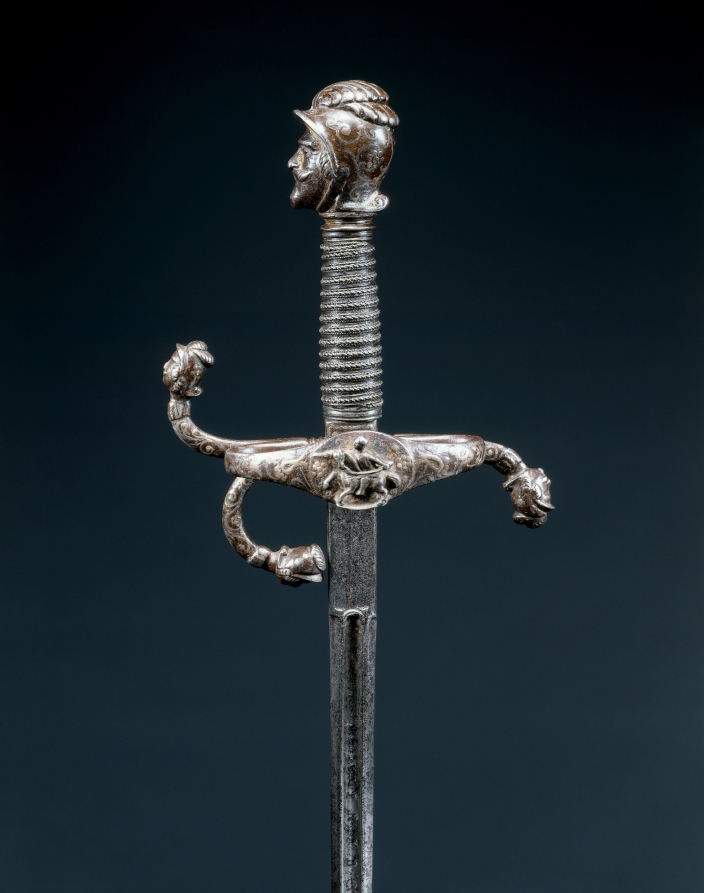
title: Rapier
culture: Germany, Solingen, early 17th Century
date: c. 1600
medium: Russeted and gilded steel with inlaid silver, pommel and quillons termini chiseled in form of warrior heads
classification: Arms and Armor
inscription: PETTHERR / WIRSBERGH